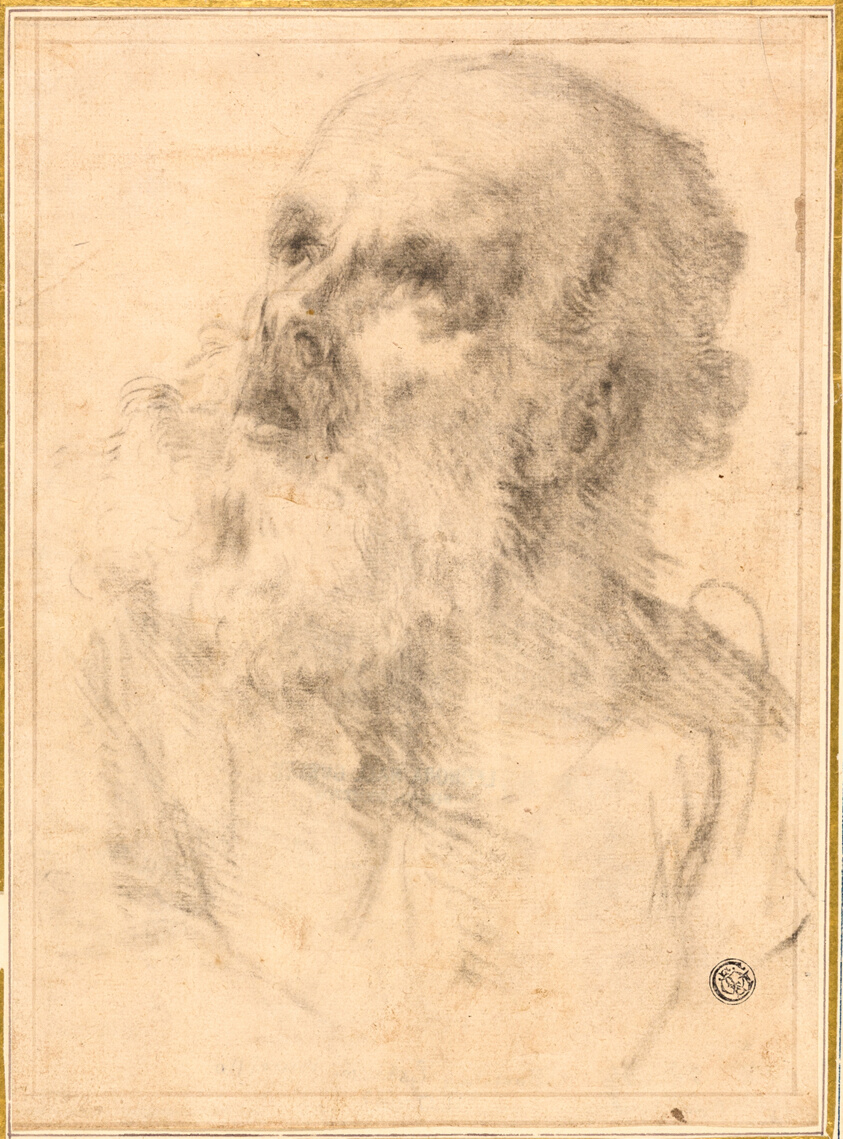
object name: Drawing and Watercolor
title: Head of an Old Man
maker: Bartolomé Estéban Murillo (Spanish, 1618-1682)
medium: Black chalk transfer on ivory laid paper, tipped onto ivory card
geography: Spain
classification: charcoal; drawings (visual works); prints and drawing